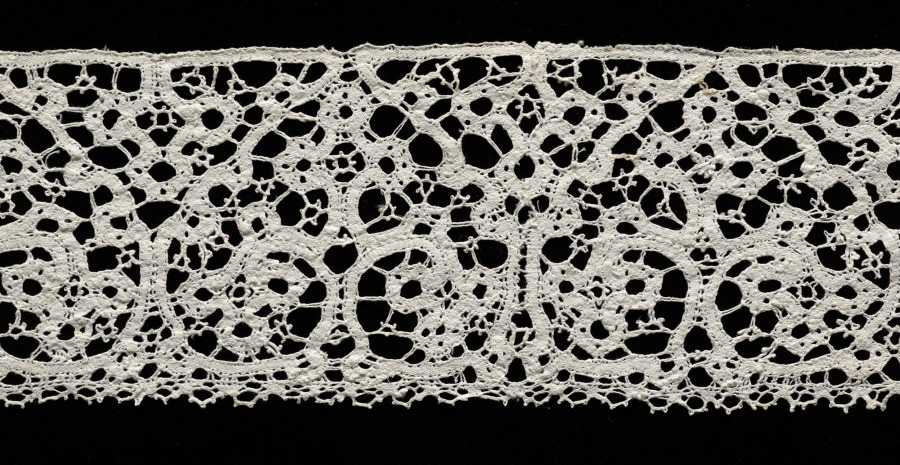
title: Lace Edging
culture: Italy, Genoa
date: 1700s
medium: Linen: bobbin lace (tape lace)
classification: Lace